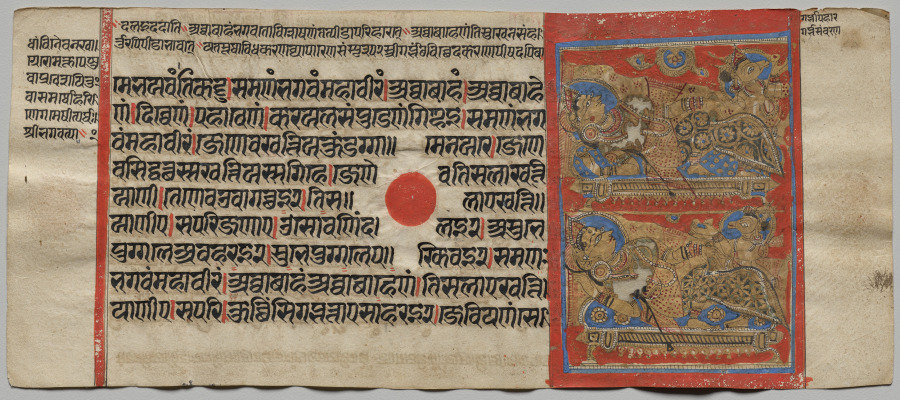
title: Transfer of the Embryo of Mahavira, Folio 12 (recto), from a Kalpa-sutra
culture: Western India, Gujarat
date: c. 1475–1500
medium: Gum tempera, ink, and gold on paper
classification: Painting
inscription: [[upper right]] garbhāpahāra/garbhasaṃvaraṇa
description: The tiny captions written in Sanskrit to the right of the painting identify the subject of this scene: “abduction of the embryo” and “transfer of the embryo.” The embryo is the unborn founder of the Jain religion. In this miraculous episode, a goat-headed divinity who presides over miscarriage and childbirth gently takes the embryo in his cupped hands away from the reclining Brahmin lady in the scene above. Below, he carries it to a queen, who will be the birth mother.